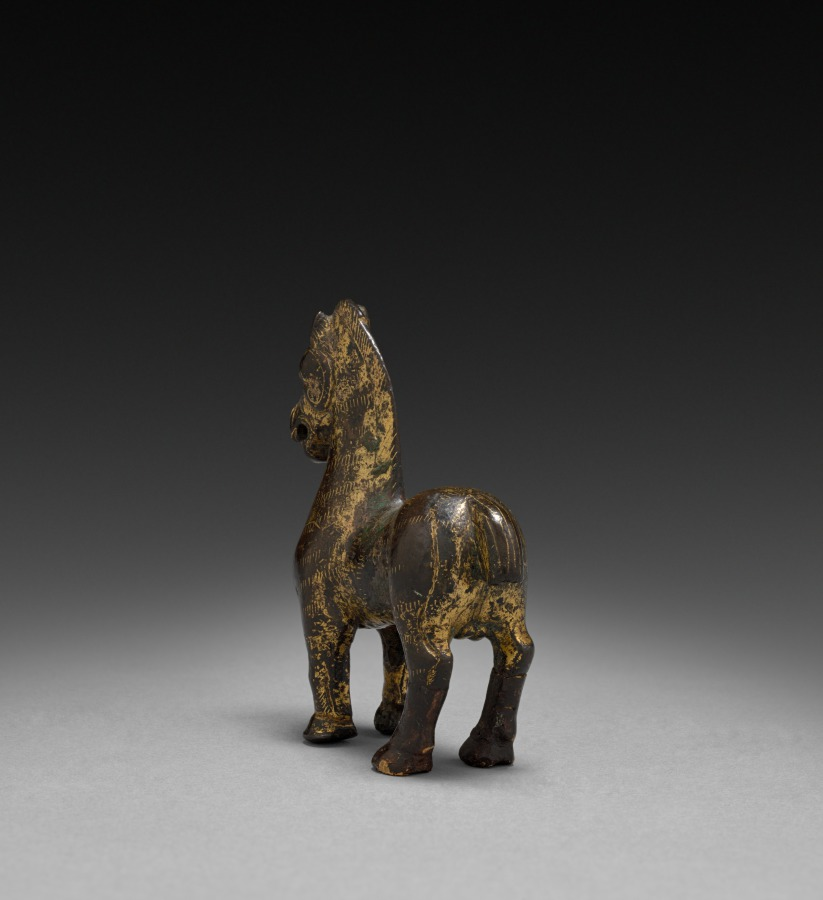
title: Horse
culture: China, Ordos Region, Han dynasty (202 BCE–220 CE)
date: 202 BCE–220 CE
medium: gilt bronze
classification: Sculpture